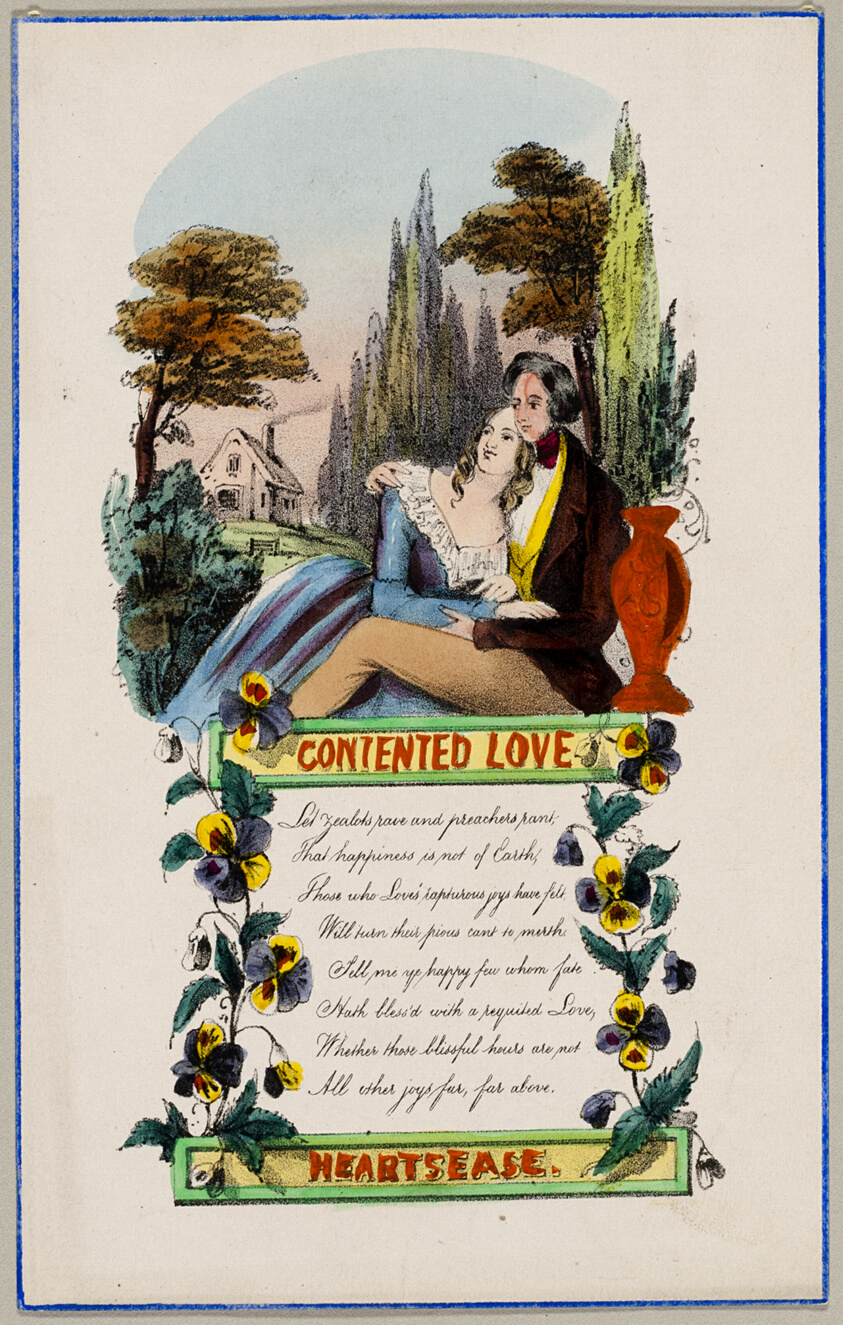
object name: Print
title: Contented Love (valentine)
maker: Unknown Artist; English, 19th century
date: c. 1840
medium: Lithograph with hand-coloring on pinkish cream laid paper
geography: England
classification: valentine; prints and drawing; print